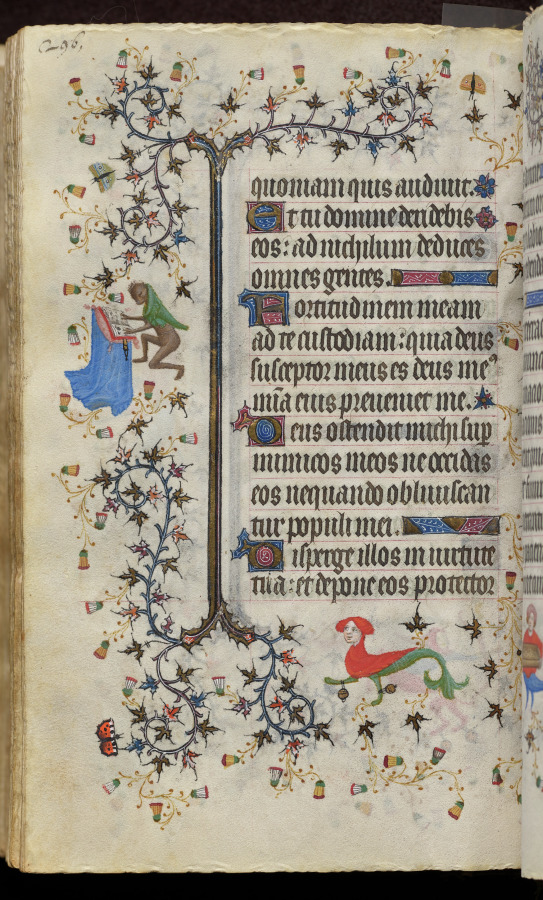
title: Hours of Charles the Noble, King of Navarre (1361-1425): fol. 148v, Text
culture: France, Paris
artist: Master of the Brussels Initials and Associates (French)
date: c. 1405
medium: ink, tempera, and gold on vellum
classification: Bound Volume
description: This precious volume was obviously highly prized by its owner, the French-born King of Navarre, who had his coat of arms painted on no less than twenty folios. Rather than directly commissioning this manuscript from a specific workshop, it seems that Charles the Noble acquired his book of hours -- perhaps ready-made for the luxury market -- while on a trip to Paris in 1404-05. A collaborative effort, six painting styles are evidenced within the pages of this codex, those of two Italians, two Frenchmen, and two Netherlanders. The painter who was responsible for the planning and decoration of the book, and who produced seventeen of the large miniatures, was a Bolognese artist known as the Master of the Brussels Initials. His principal assistant, responsible for most of the borders, was a Florentine who signed his name "Zecho" da Firenze on folio 208 verso.